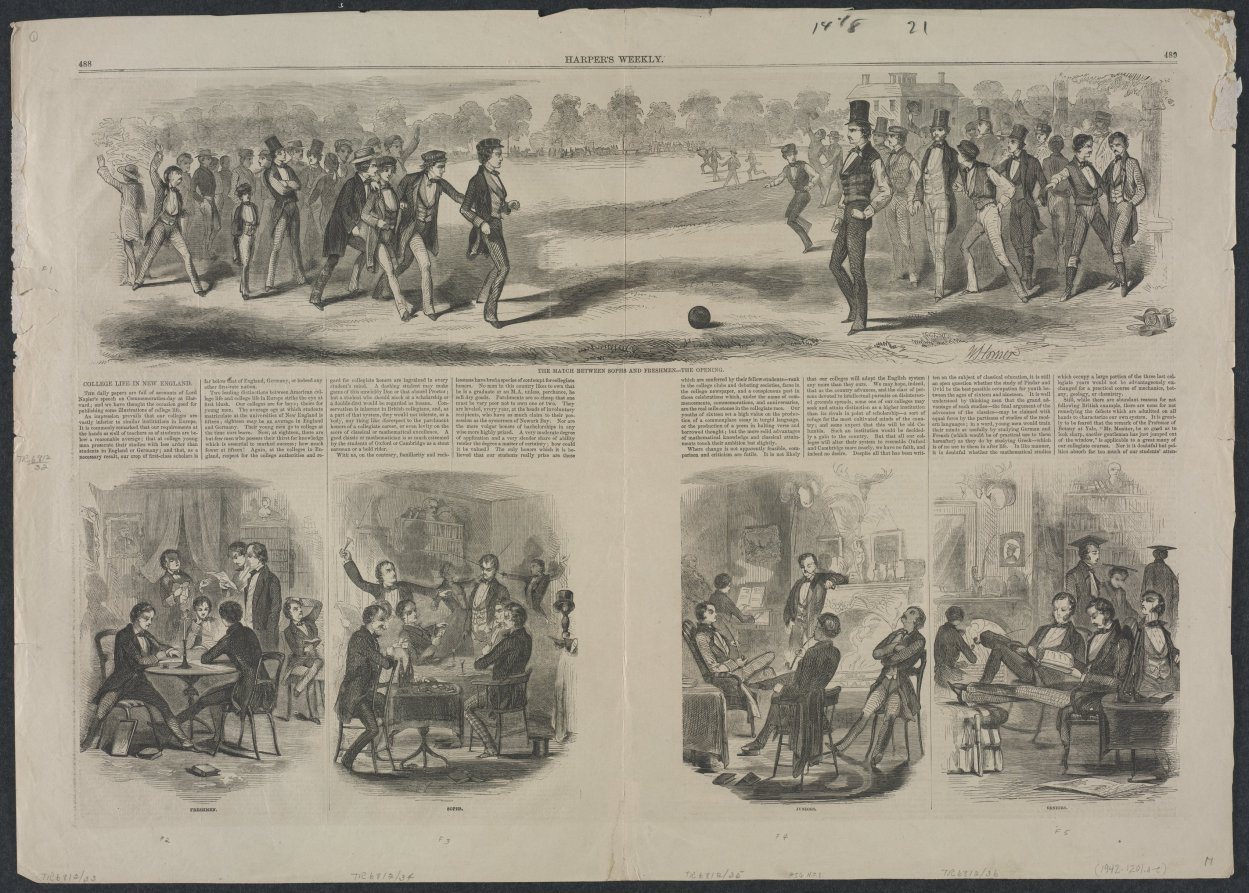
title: The Match between the Sophs and Freshmen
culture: America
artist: Winslow Homer (American, 1836–1910)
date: 1857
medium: wood engraving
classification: Print